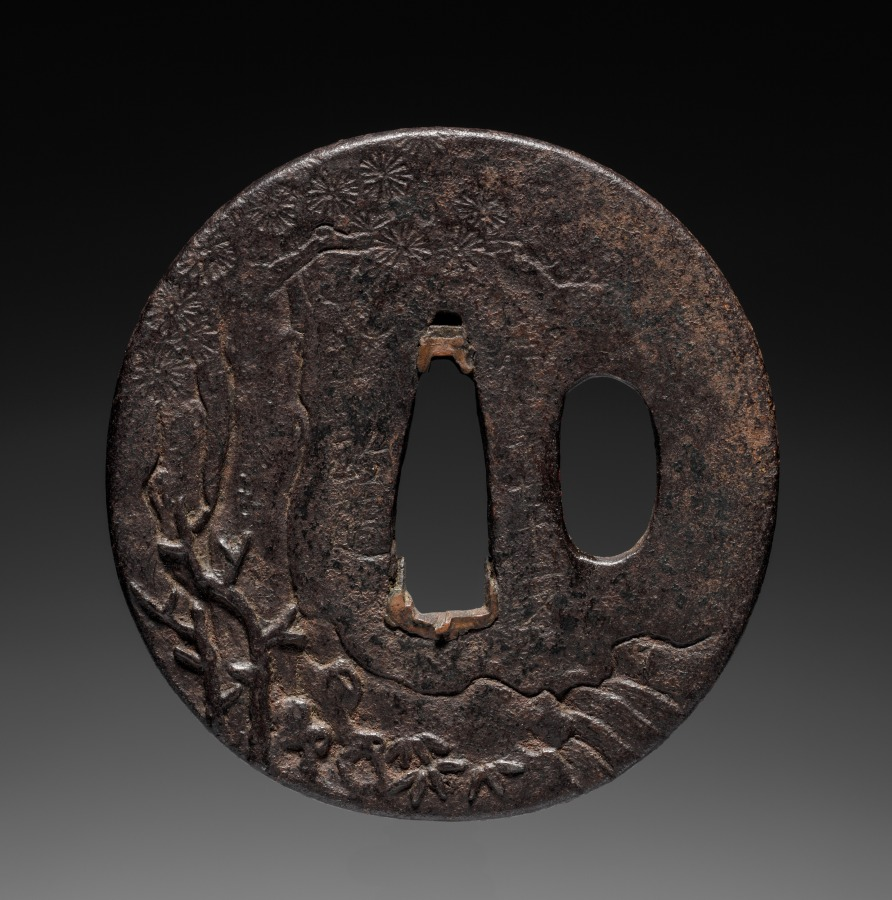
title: Sword Guard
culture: Japan, Edo period (1615–1868)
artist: Masayuki (Japanese, 1691–1764)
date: c. 1762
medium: iron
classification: Arms and Armor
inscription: Signature: Masayuki, executed at the age of seventy-one